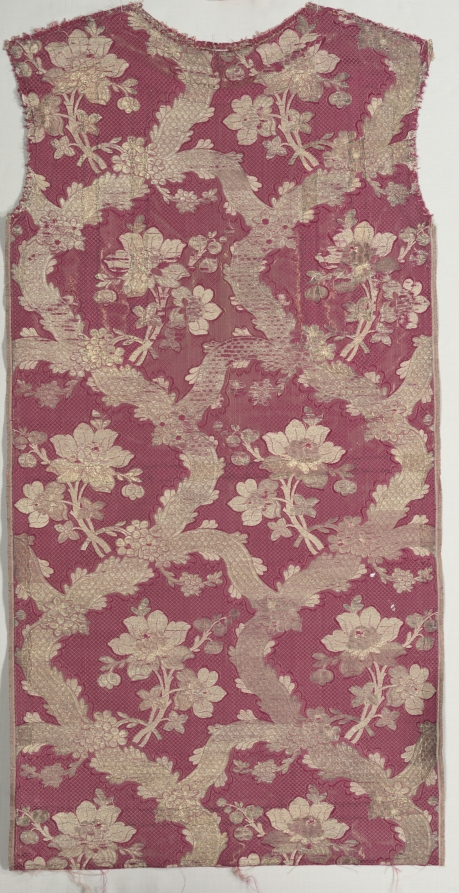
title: Fragment of Brocaded Silk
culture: Spain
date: 1700s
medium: plain cloth, brocaded; silk and metal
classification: Textile